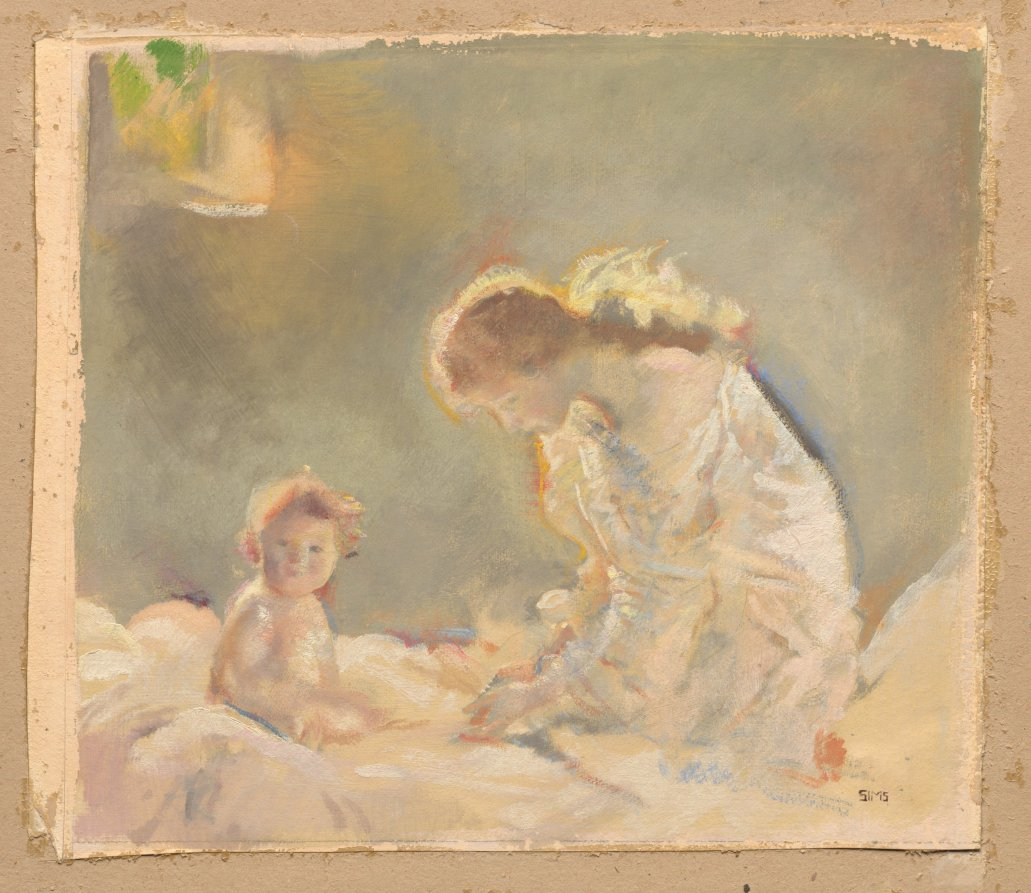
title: Child Worship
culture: England, 20th century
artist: Charles Sims (British, 1873–1928)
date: c. 1926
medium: oil on paper over graphite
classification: Drawing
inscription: signed SIMS in lower right.